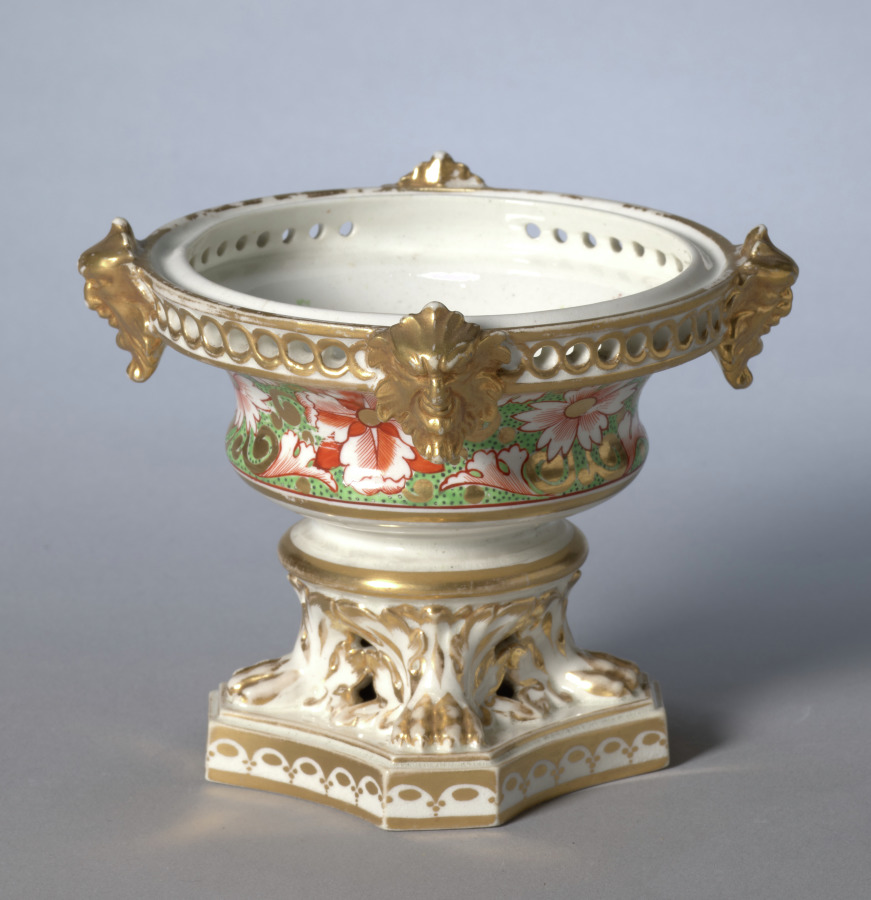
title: Potpourri Vase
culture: England, Derby, 19th century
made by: Derby (Crown Derby Period) (British)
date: c. 1810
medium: porcelain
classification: Ceramic